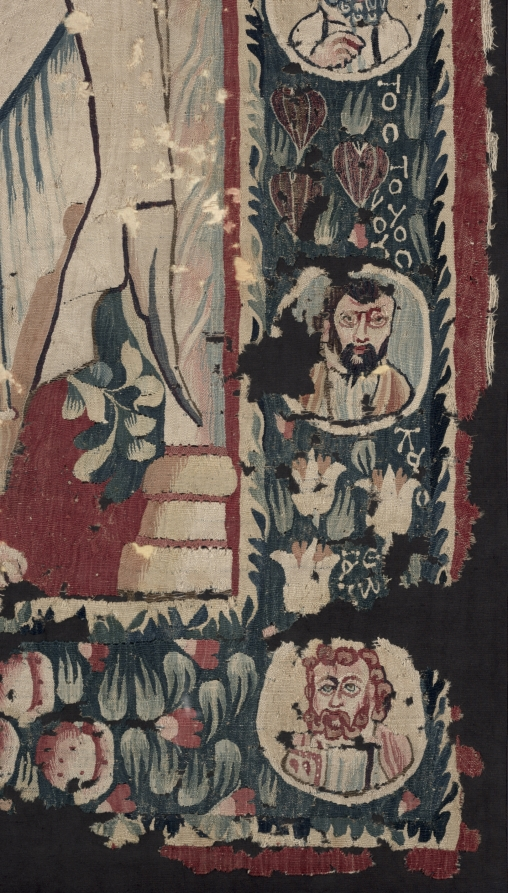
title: Icon of the Virgin and Child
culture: Egypt, Byzantine period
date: 500s CE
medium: wool and dye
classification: Textile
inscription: on the lintel of the architectural setting, the Greek inscription translates as: The Holy Michael, The Holy Mary, The Holy Gabriel. The wide foliate border is decorated with fruits and flowers and, in the lower part, with medallions containing the busts of apostles whose names are inscribed nearby in Greek and are translated as: Andrew, Matthew, Paul the Apostle, Luke, James, Phillip, Mark, Thomas, John, Matthias, Peter, and Bartholomew.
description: Woven from more than 20 colors of woolen thread, this rare tapestry was more expensive than a painting when it was made. The historical price reflected contemporary viewers’ appreciation for the skilled color blending by the weavers. Hung on a wall, this tapestry allowed viewers to venerate (honor) the Virgin Mary and the Christ Child in the Christian Orthodox church. Angels and apostles surround them, their names written in Greek. To be spiritually effective, an icon (devotional image) should follow its subject’s established visual tradition as closely as possible.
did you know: Created in Egypt's hot and dry desert climate, this tapestry features a border of lush greenery and fruits, while flowers peek out from around the throne of the Virgin. Imagine encountering this artistic oasis in a Coptic church during the dry heat of the day.